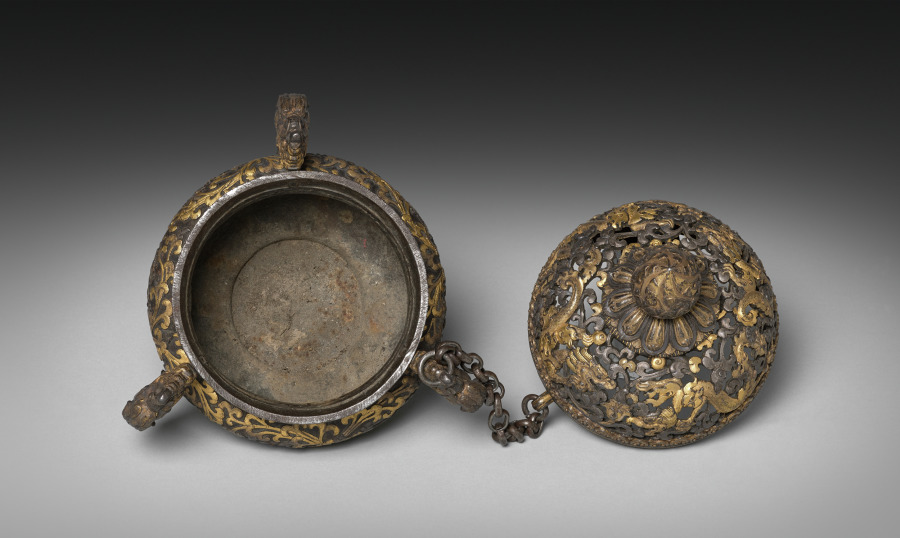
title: Incense Burner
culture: China, Yongle Period (1403-1424)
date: early 1400s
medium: iron inlaid with gold and silver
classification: Metalwork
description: This incense burner with gold and silver inlay has three dragon-head handles. Its main body is decorated with flowers placed in round fields formed by a winding creeper. The perforated cover is decorated with a dragon. The lotus bud on the top is used as a handle.